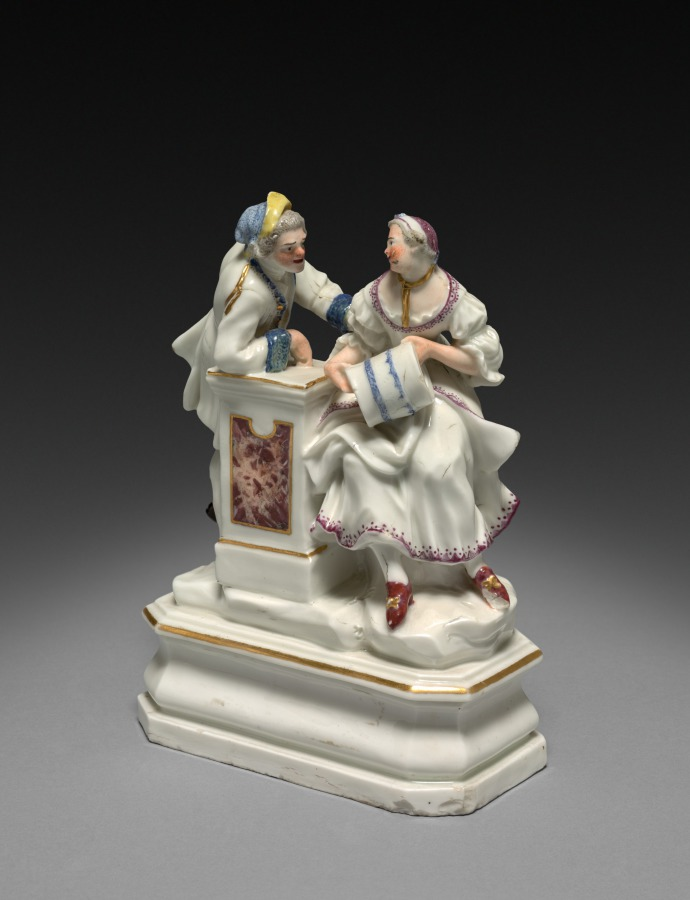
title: Woman and Man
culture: Italy, Naples, Capo di Monte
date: c. 1750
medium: porcelain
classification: Ceramic